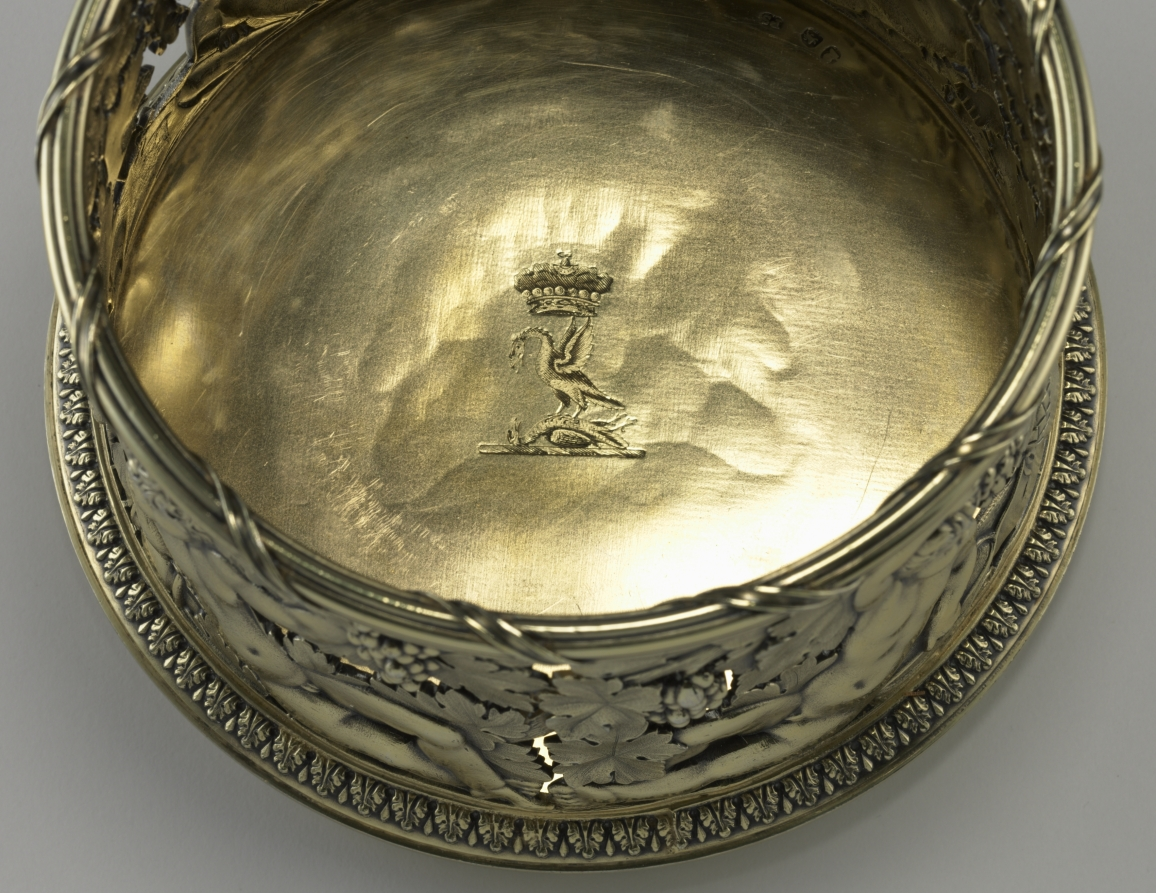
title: Decanter Stand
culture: England, London, 19th century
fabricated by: Paul Storr (British, 1771–1844)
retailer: Rundell, Bridge and Rundell (British, 1797–1834)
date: 1814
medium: silver gilt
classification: Silver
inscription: Engraved on rim of base: "RUNDELL BRIDGE ET RUNDELL AURIFICES REGIS ET PRINCIPIS WALLIAE REGENTIS BRITANNIAS."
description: Decanter stands served as coasters for glass wine bottles in order to protect the extremely expensive and fragile linen tablecloths they sat upon. This example contains depictions of large grape vines and youthful figures that evoke the Roman god of wine, Bacchus (or Dionysus in Greek mythology). One of the young boys grasps an empty drinking vessel while the other leans against a panther, the frequent companion of Bacchus.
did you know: Bacchanal motifs of grapes and consumption echo this object’s function as a stand for a wine decanter.